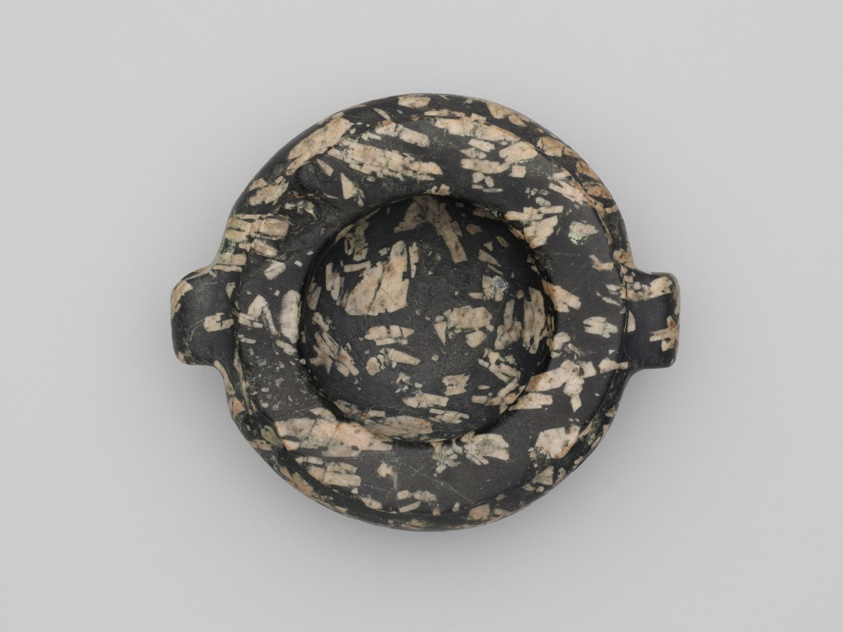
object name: Vessel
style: ancient, egyptian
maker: Egyptian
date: Predynastic Period, Late Naqada II (about 3300–3200 BCE)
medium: Andesite porphyry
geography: Egypt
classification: vessel; stone; ancient art